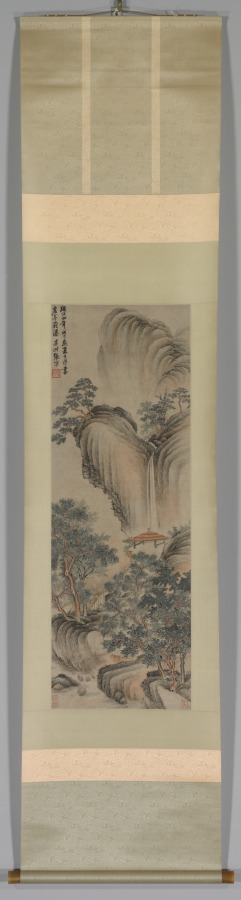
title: Empty Arbor and Rapid Waterfall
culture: China, Ming dynasty (1368–1644)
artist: Zhang Ning (Chinese, 1426-c. 1495)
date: 1468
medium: hanging scroll, ink and color on paper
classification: Painting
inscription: Artist's inscription, signature, and 2 seals: Painted in the summer, the fifth month of the wu-tzu year, the fourth year of the Ch'eng-hua era [1468]. Empty Arbor and Rapid Waterfall. Fang-chou, Chang Ning [seals] Ching-chih; Fang-chou ts'ao-t'ang. 2 additional seals: 1 of Ch'eng Ch'i; 1 unidentified.